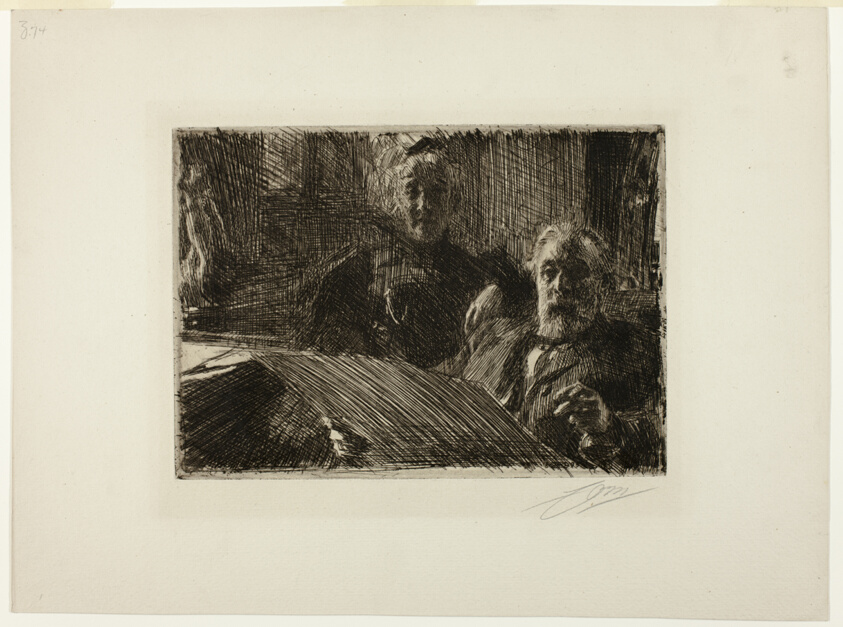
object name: Print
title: Mr. and Mrs. Fürstenberg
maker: Anders Zorn (Swedish, 1860-1920)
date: 1895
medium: Etching on ivory laid paper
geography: Sweden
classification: etching; print; prints and drawing